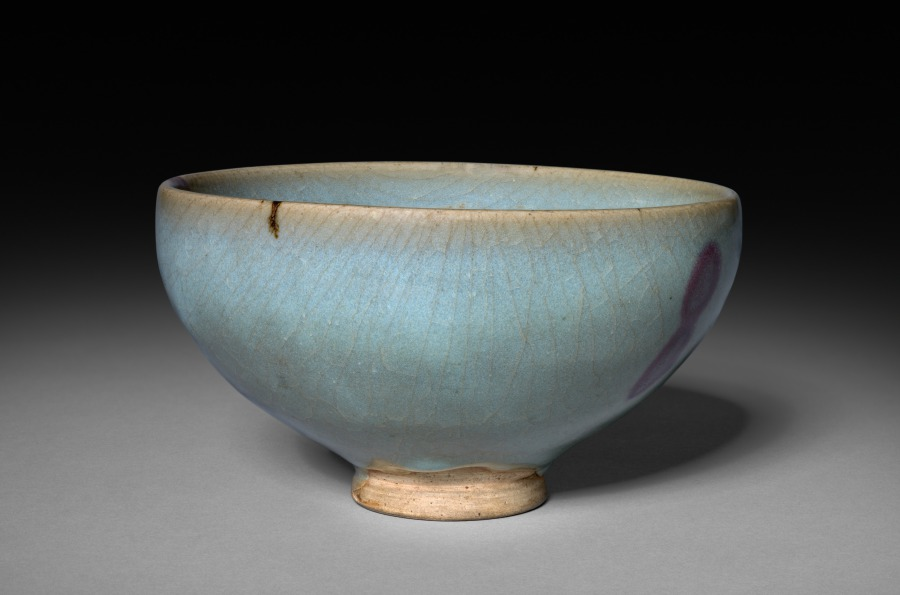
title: Bowl: Jun ware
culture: Northern China, Jin dynasty (1115-1234) - Yuan dynasty (1271-1368)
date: Jin dynasty (1115–1234) - Yuan dynasty (1271–1368)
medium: glazed buff stoneware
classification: Ceramic